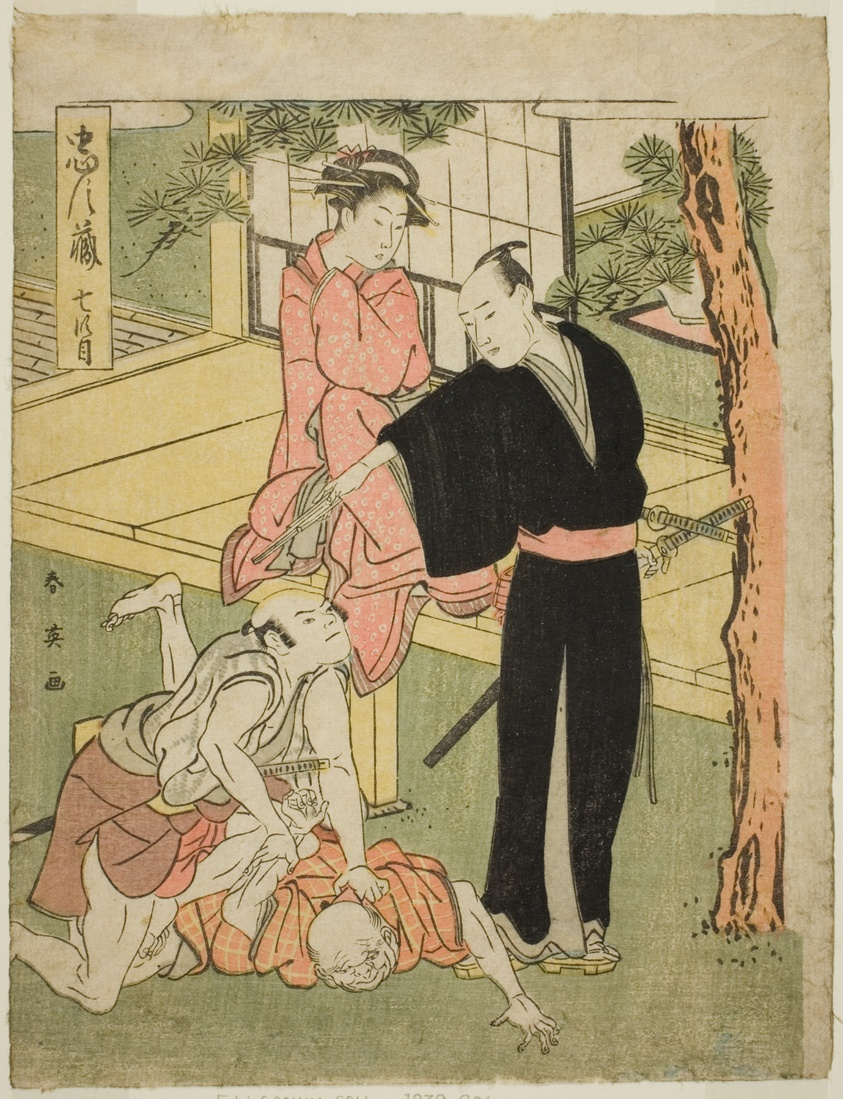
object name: Print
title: Act Seven: The Ichiriki Teahouse from the Play Chushingura (Treasury of the Forty-seven Loyal Retainers)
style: Japanese (culture or style)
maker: Katsukawa Shun'ei (Japanese, 1762-1819)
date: c. 1795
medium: Color woodblock print; koban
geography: Japan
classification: woodblock print; print; asian art